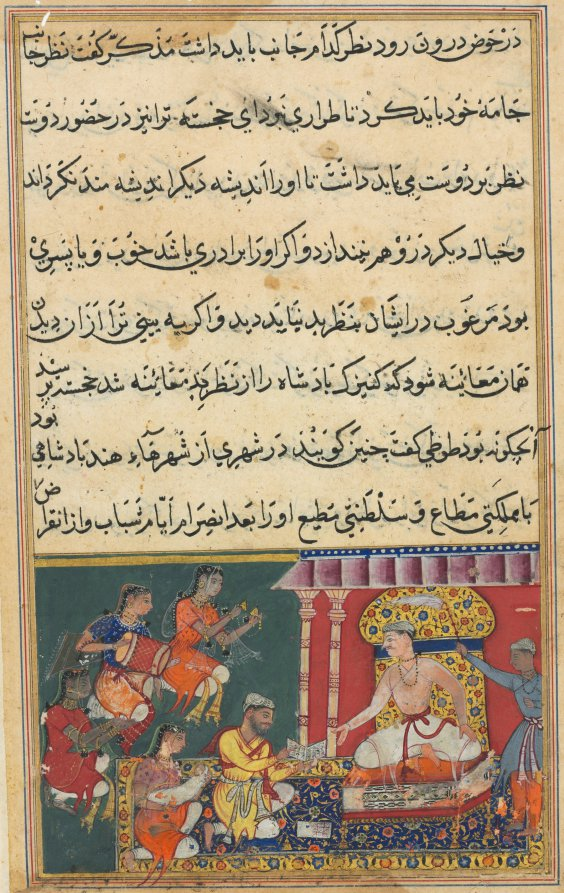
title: The astrologer predicts a calamity for the newly born prince in his thirteenth year, but one which he would be able to overcome, from a Tuti-nama (Tales of a Parrot): Eighth Night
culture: Mughal India, court of Akbar (reigned 1556–1605)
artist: Banavari 1 (Indian, active 1550s-1590s)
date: c. 1560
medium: gum tempera, ink, and gold on paper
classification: Painting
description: The parrot’s tale on the eighth night begins with a king in India who finally had a son late in life. The painting depicts the king enthroned, gesturing to the documents of an astrologer who has predicted that the child will undergo severe hardship in his 13th year, but that he will overcome them. The infant prince is held in the arms of a woman kneeling at the left. Female musicians provide accompaniment to the scene. The flat red background, drawn from indigenous Indian painting traditions, visually connotes the emotionally charged quality of this moment for the king.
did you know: The bearded astrologer has a chart with calculations on the carpet in front of him.